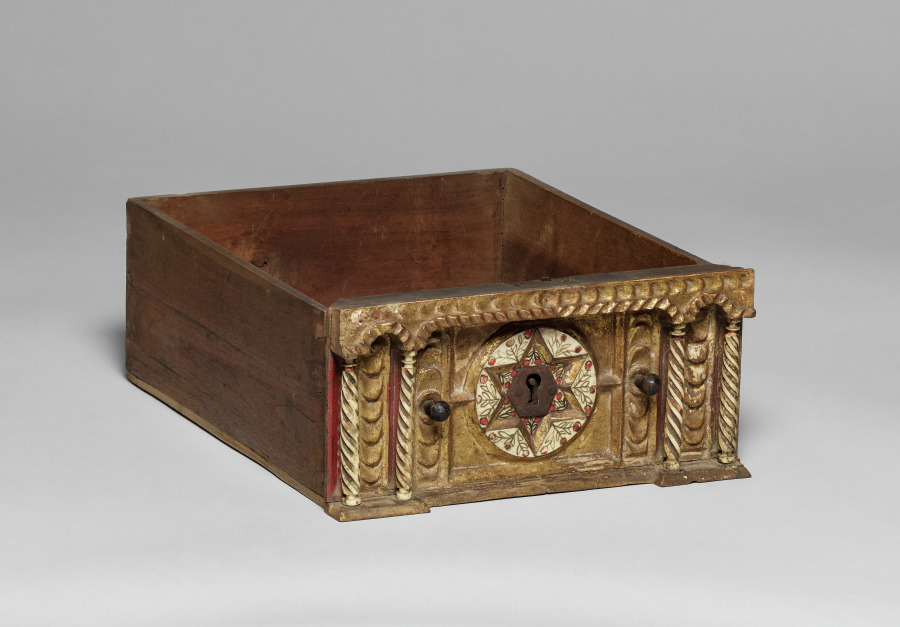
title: Chest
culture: Spain, Colonial, late 17th Century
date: late 1600s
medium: turned and joined wood, gilded and painted red with applied bone columns and bone inlays, wrought iron hardward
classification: Furniture and woodwork